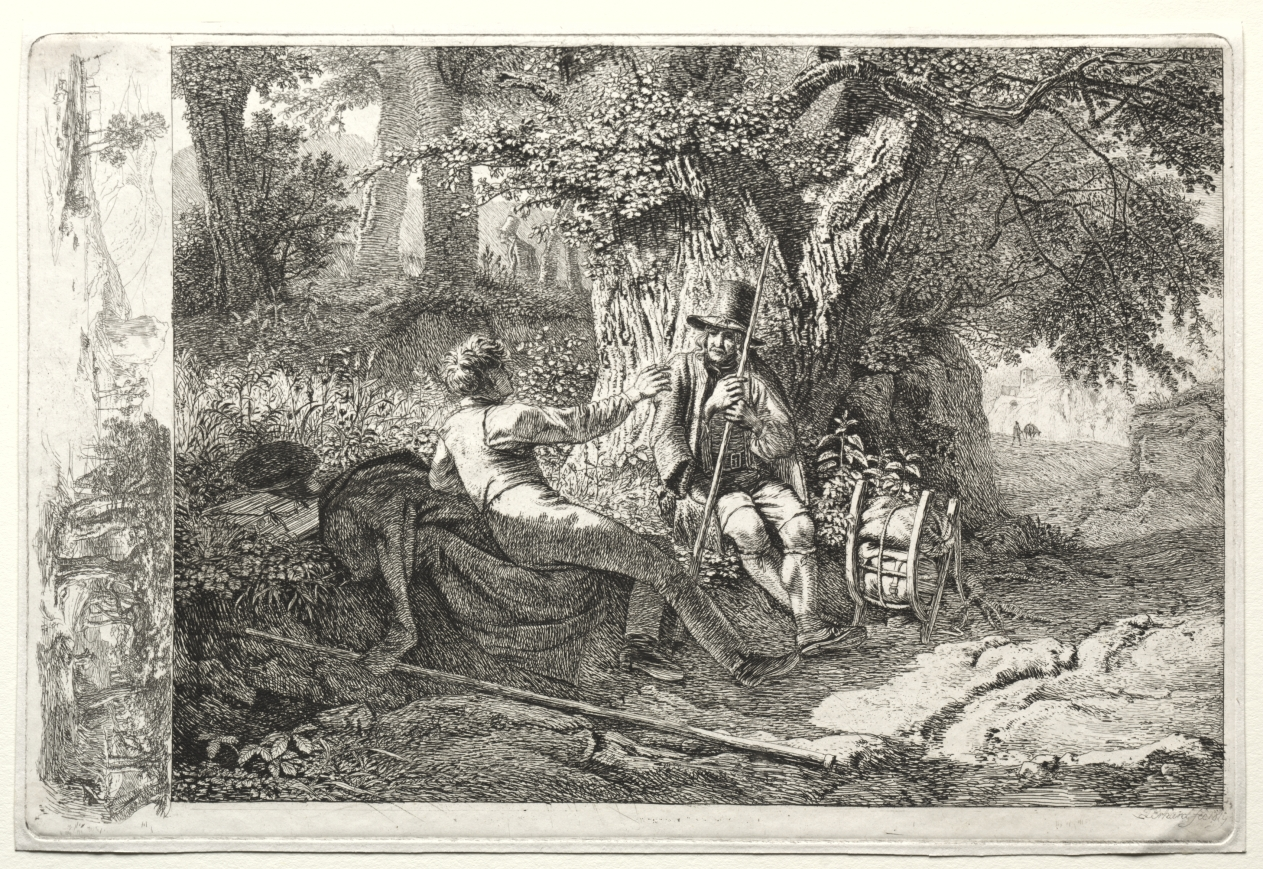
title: Der mit seinem Fuhrer rastende Kunstler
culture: Germany, 19th century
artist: Johann Christoph Erhard (German, 1795–1822)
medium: etching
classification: Print